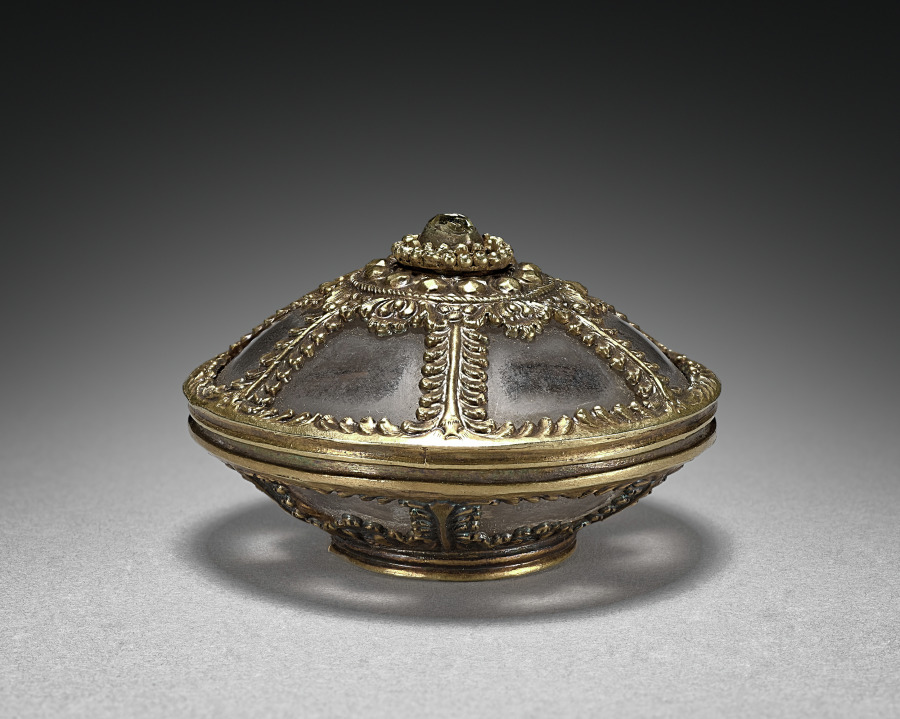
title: Box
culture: Java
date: 20th Century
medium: glass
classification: Glass